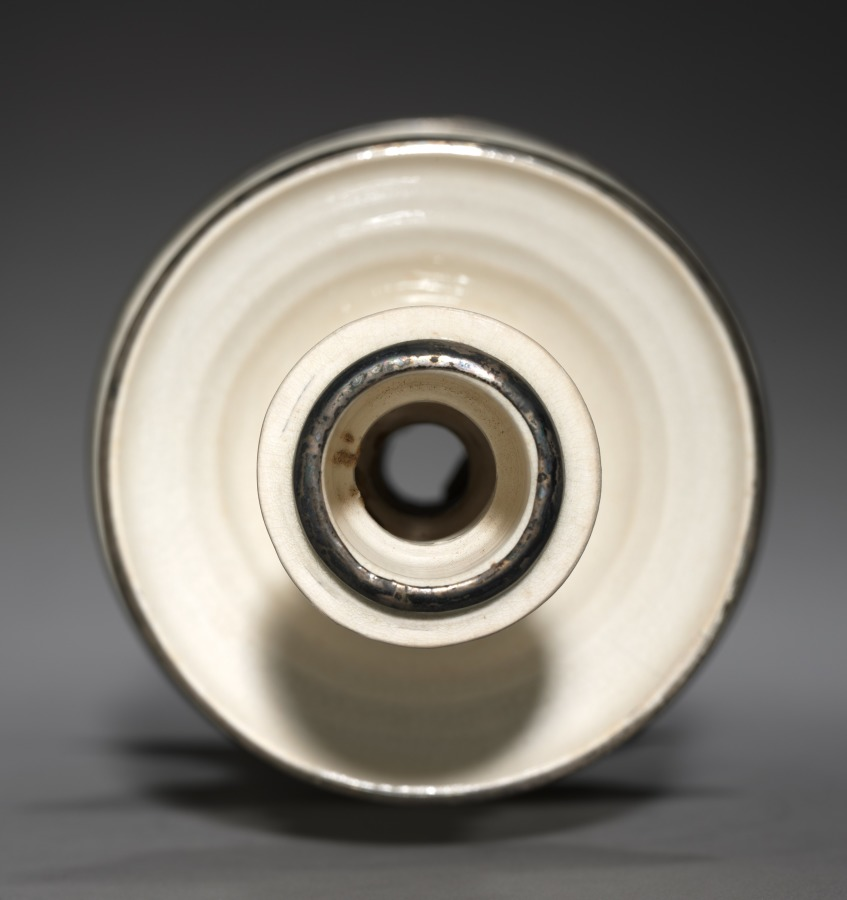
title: Candlestick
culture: China, Ming dynasty (1368–1644)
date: 1600s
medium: glazed porcelain with metal rims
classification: Ceramic